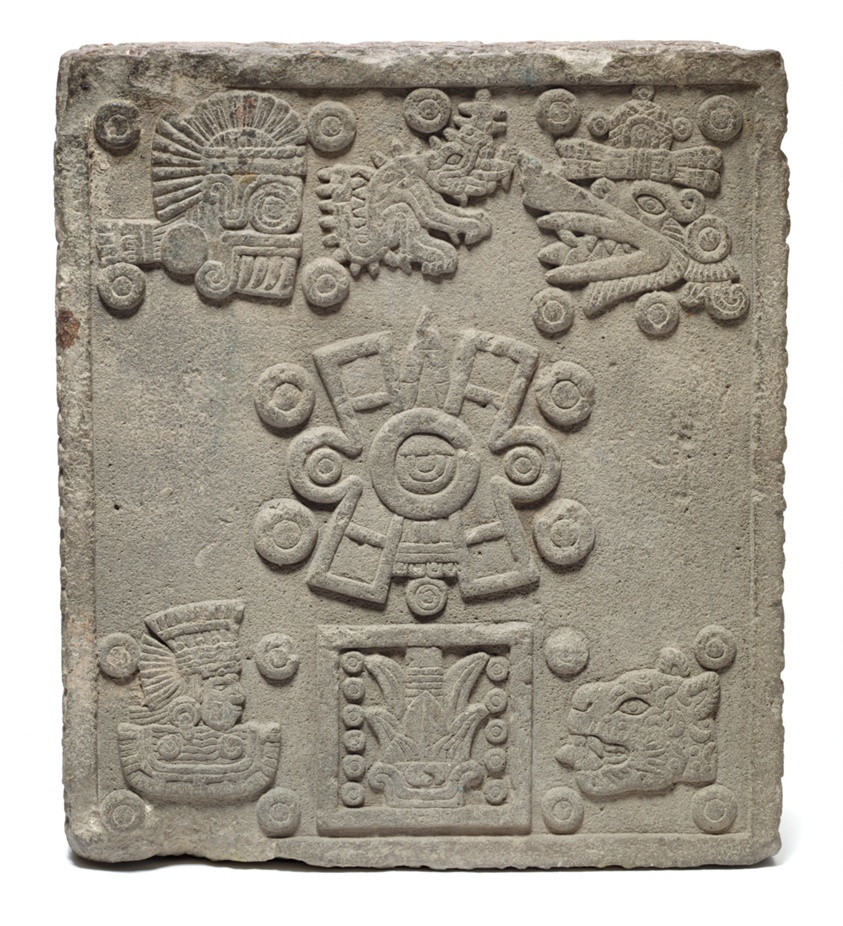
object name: Sculpture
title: Coronation Stone of Motecuhzoma II (Stone of the Five Suns)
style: aztec, mesoamerican, Pre-Columbian, americas, Arts of the Americas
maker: Aztec (Mexica) (Tenochtitlan, Mexico)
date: 1503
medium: Basalt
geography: Tenochtitlan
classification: ceremonial object; stone; art of the americas; sculpture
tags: architecture, history, coronations, animals, record of events, Hieroglyphs, Mexico, Aztecs, mythology, kingship, rulers (people), goddesses